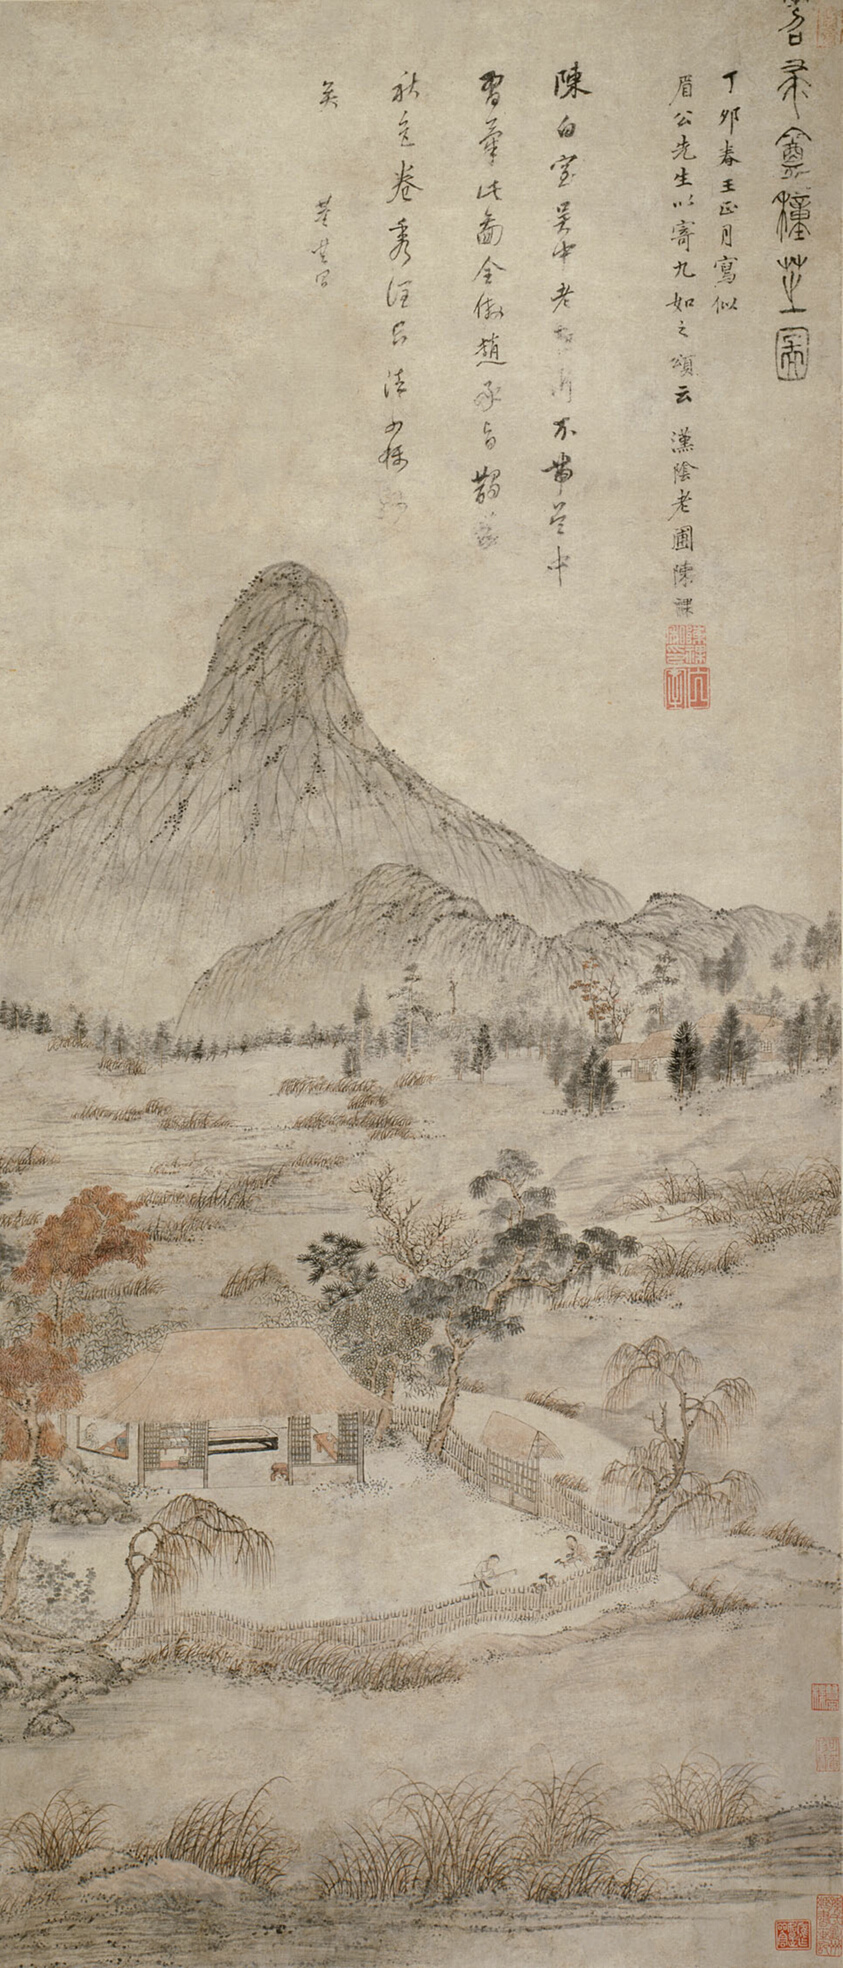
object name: Painting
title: Planting Fragrant Fungus at the Tiaozhou'an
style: Chinese (culture or style)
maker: Attributed to Chen Guan; Chinese, 1563-1639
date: Ming dynasty (1368–1644), 1627 (?)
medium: Hanging scroll; ink and light color on paper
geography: China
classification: hanging scroll; painting; asian art